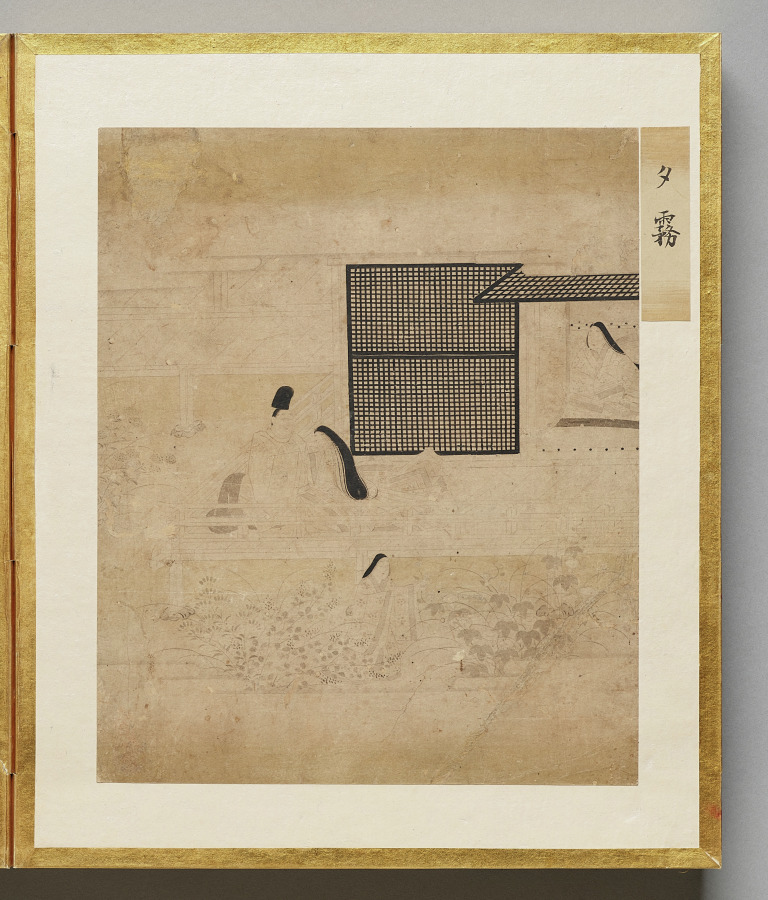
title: Evening Mist from Album of Illustrations for the Tale of Genji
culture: Japan, Edo period (1615–1868)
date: 1600s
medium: painting in an accordion-style album; ink, light color, and gold on paper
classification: Bound Volume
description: This album contains illustrations for the classic literary work the Tale of Genji, authored in the 1000s by Murasaki Shikibu, an aristocrat of the Heian period (794–1185) court. The scenes are painted in the “white drawing” (hakubyō) mode, in which a fine ink line is used to depict figures and spaces with great subtlety, punctuated only occasionally by traces of red pigment for a character’s lips, a detail of a garment, or a decorative element. These two scenes illustrate episodes from the chapters “Thin Veil of Cloud” (Usugumo) and “Barrier Gate” (Sekiya).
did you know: The illustrations are identified by chapter title in cartouches to the upper right of the paintings.